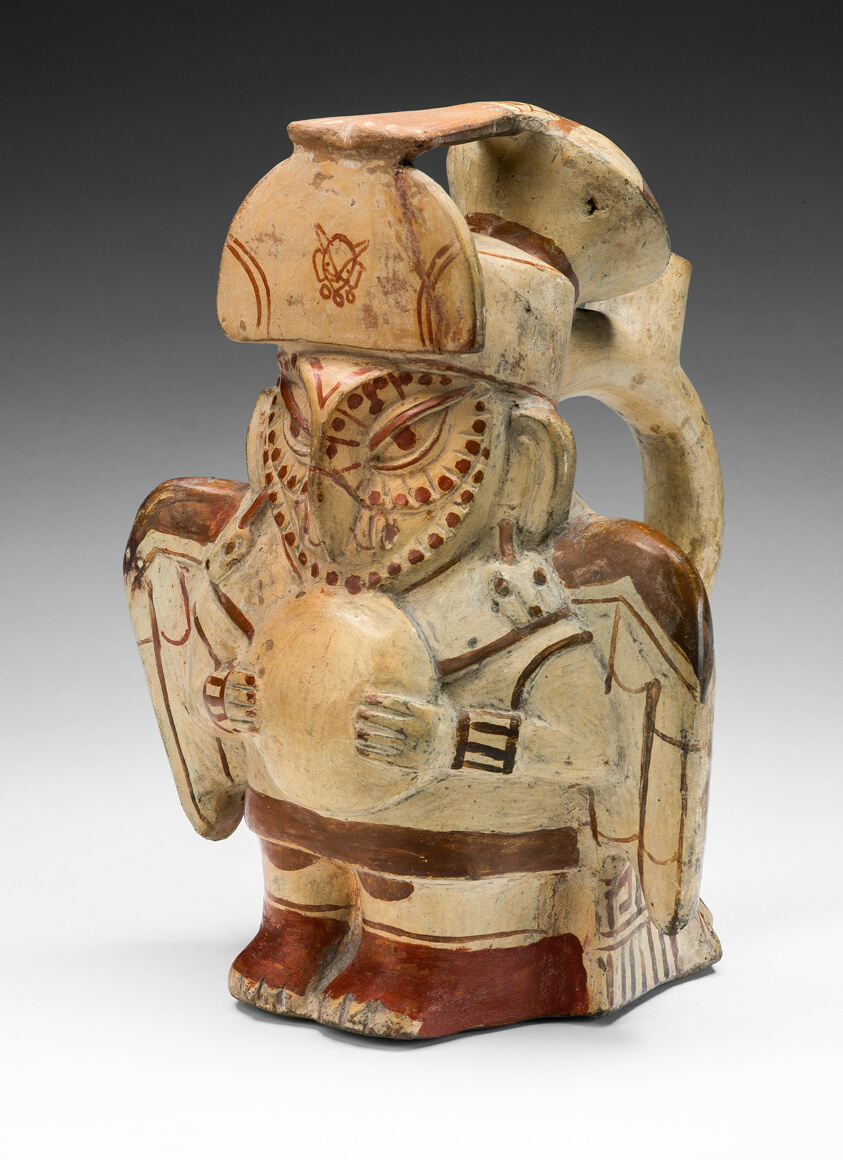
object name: Vessel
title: Vessel in the Form of an Owl Impersonator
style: moche, mochica, early intermediate period, Pre-Columbian, americas, andes, Arts of the Americas, andean, south american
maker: Moche (North coast, Peru)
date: 100 BCE–500 CE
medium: Ceramic and pigment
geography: Peruvian North Coast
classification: earthenware; art of the americas; ceramics; vessel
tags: ritual, animals, birds, masks, costumes, anthropomorphic figure